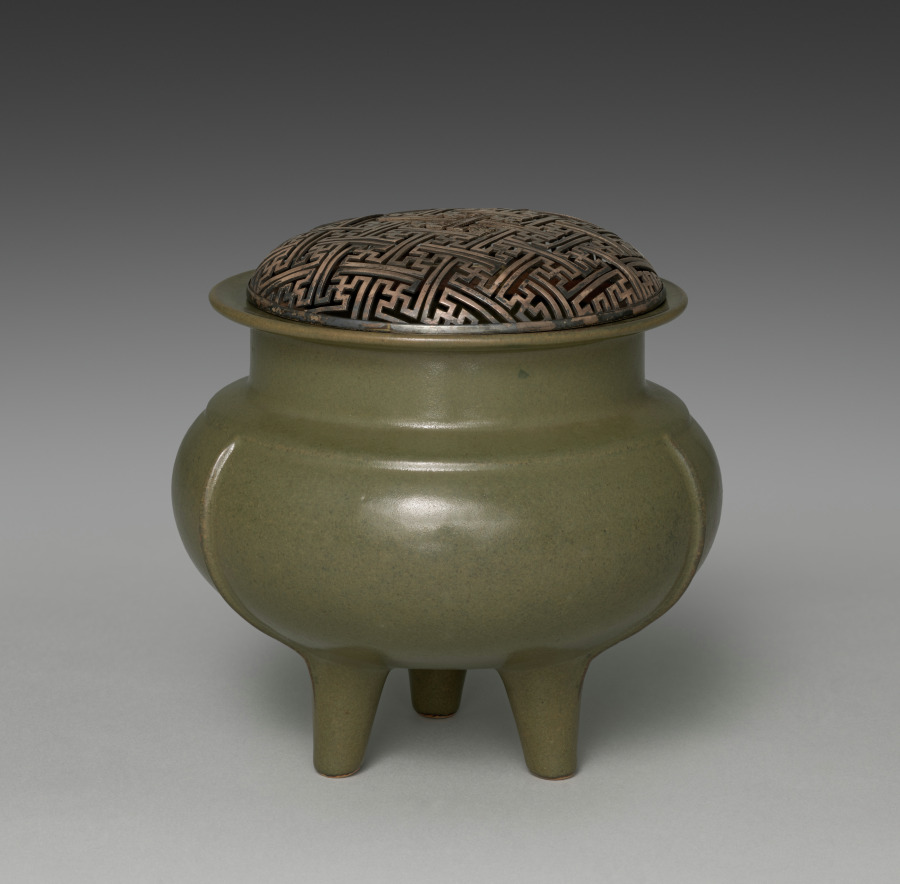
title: Incense Burner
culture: Japan, Meiji period (1868–1912)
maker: Seifū Yohei III (Japanese, 1851–1914)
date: 1895–1914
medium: Porcelain with tea-leaf colored glaze and molded design and geometric openwork silver lid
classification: Ceramic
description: Kyoto-based Japanese ceramist Seifū Yohei III (1851–1914) admired the glaze colors found on Chinese porcelain and tried to replicate them through intensive experimentation. His green and creamy white glazes were particularly well received. The combinations of colors with subtle molded and incised decorations in his ceramics respond powerfully to changes in light, creating a dynamic viewing experience. Names for the glazes, written in ink with a brush on the lids of the custom-made storage boxes for the works, often indicate a specific glaze or ware that had inspired him, even when the resulting color was distinctively his own.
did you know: This incense burner with a geometric-patterned silver lid has a glaze identified on its box lid as “tea leaf [color–glazed] porcelain” (chayōji).